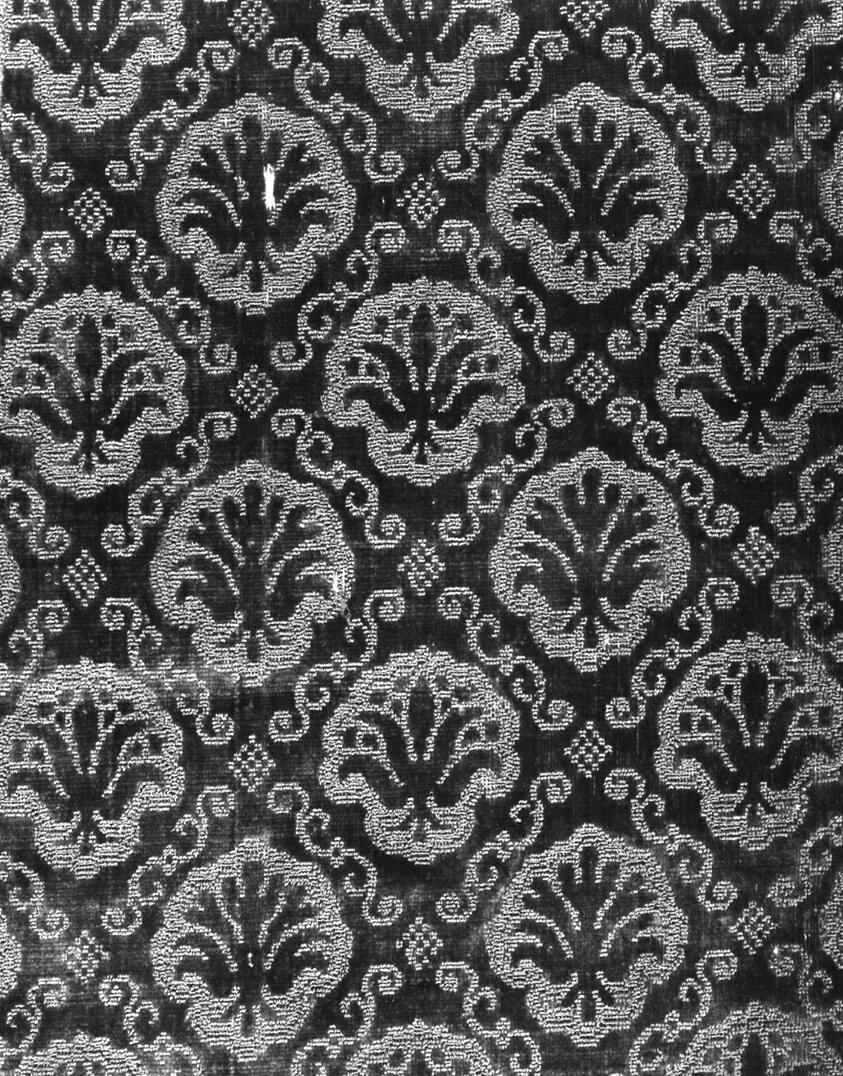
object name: Textile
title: Fragment (From a Chasuble)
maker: Italy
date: 1575/1625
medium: Silk, warp-float faced 3:1 broken warp chevron twill weave with supplementary pile warps forming cut and uncut voided velvet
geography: Italy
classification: textile; weaving - velvet; liturgical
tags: flowers